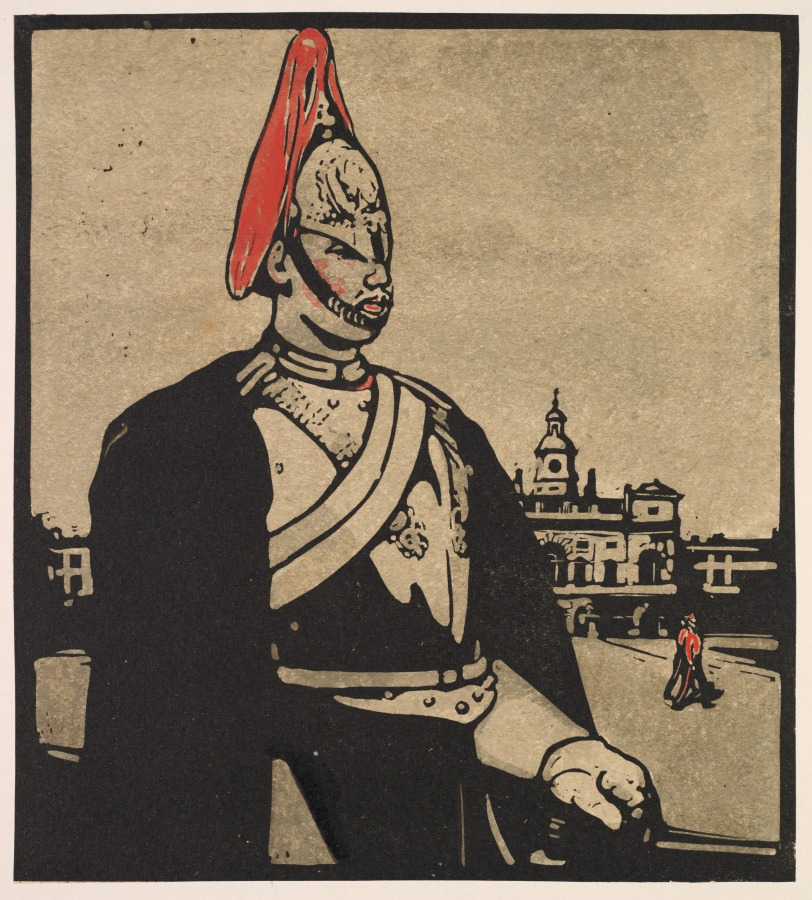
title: London Types: Guardsman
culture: England, 19th century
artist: William Nicholson (British, 1872–1949)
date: 1898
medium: woodcut hand-colored with watercolor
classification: Print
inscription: lower left margin, in black ink: William Nicholson - 1898 -